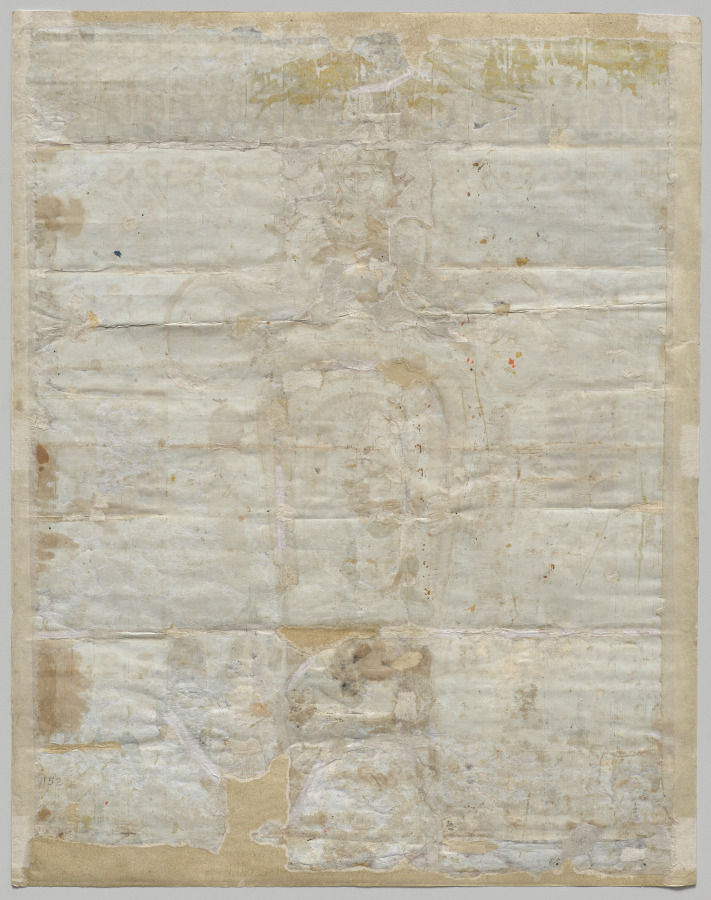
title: Blessed Lord Buddha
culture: Sri Lanka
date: c. 1825–50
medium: gum tempera on paper, varnished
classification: Painting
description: The central figure of the Buddha, radiating light and the flame of enlightenment, is flanked by his four main disciples: Sariputra and the blue Moggallana on his left, and Ananda and Anuruddha on his right. Below him is the earth goddess holding a pot of water on her head. To her right are three guardians of Sri Lanka: Kataragama (or Skanda) with six heads and twelve arms; the blue Vibhishana, younger brother of Ravana; and, smaller in size, may be Pattina holding an anklet and neem leaf. On the opposite side are three deities: Sumana, the four-faced Brahma, and four-armed Shiva with trident. Arranged around two depictions of the bodhi tree under which the Buddha reached enlightenment, rows of other monks bear garlands in veneration. Each of the standing protector divinities around the periphery grasps a bow and arrow. This painting evokes the appearance of 18th- to 19th-century murals in Sri Lankan Buddhist temple interiors, such as those at Dumbulla, with its rows of golden figures. It was probably part of a domestic shrine, along with small sculptures of the Buddha, palm-leaf manuscripts of Pali scriptures, incense, oil lamps, bells, and other offerings such as food, flowers, and water. The varnish that covers the painting may have been intended to shield it from the environment of an active place of worship.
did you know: The yellow pigment contains chromium, which was not used in pigments until 1818.